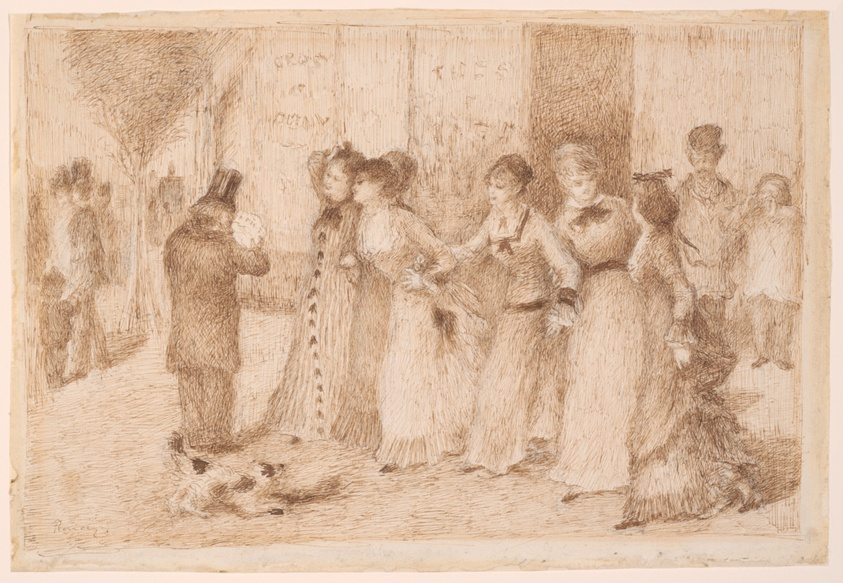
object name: Drawing and Watercolor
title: Workers' Daughters on the Outer Boulevard (Illustration for Émile Zola's "L'Assommoir")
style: Impressionism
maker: Pierre Auguste Renoir; French, 1841-1919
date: 1877/78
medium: Pen and brown ink, over black chalk, on ivory laid paper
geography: France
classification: pen and ink drawings; drawings (visual works); prints and drawing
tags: women, circles, urban life